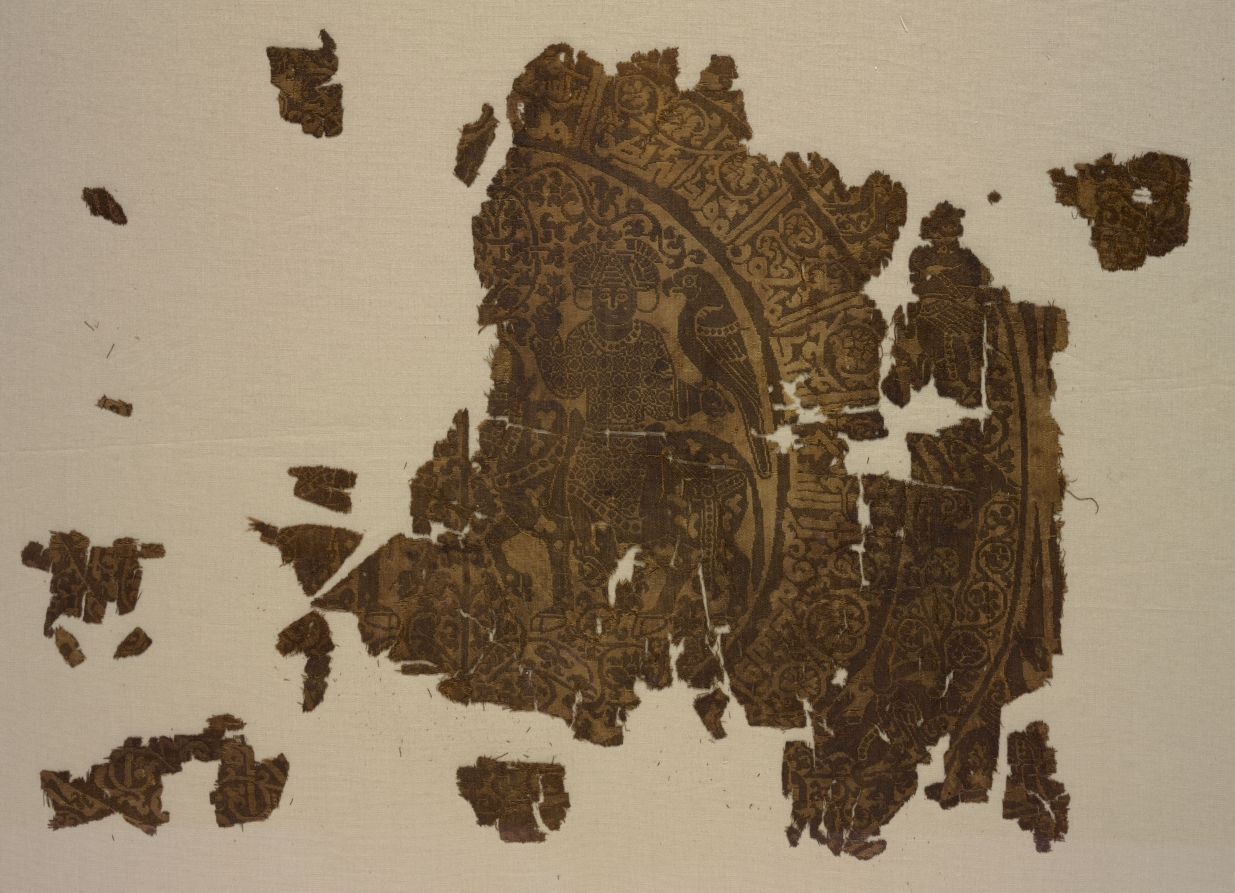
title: Fragment with falconer riding a bull in a rondel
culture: Iran, Rayy, Seljuk period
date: 1000s–1100s (radiocarbon date, 95% probability)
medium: Silk: double cloth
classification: Textile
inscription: inner band of a foliate Kufic inscription: ". . . . . . wa-bastah wa-'ala['] lil-shay[kh?] al-sayyid al-mansur al-mu['a] yyad Abi Nasr . . . bin[?] . . ."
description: The princely sport of falconry was frequently represented in medieval luxury silks. Here, the falconer wears a jeweled turban, the most significant item of men’s dress, and rides sidesaddle on a bull. His tunic displays two small designs: overlapping octagons and the conventional star and cross motif. On his gloved hand, he probably supports a coveted gyrfalcon, a large, superior bird. The border displays an inner inscription and an outer animal procession, an ancient Near Eastern theme, of real and mythical creatures. This double cloth has two distinct layers that exchange position according to the pattern. The crisply broken edges and scattered brittle threads are typical of the fragility of authentic medieval Iranian silks.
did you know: The falconer's round face with delicate features represents the ideal Iranian beauty, complemented by the chic round hairballs beside his cheeks.